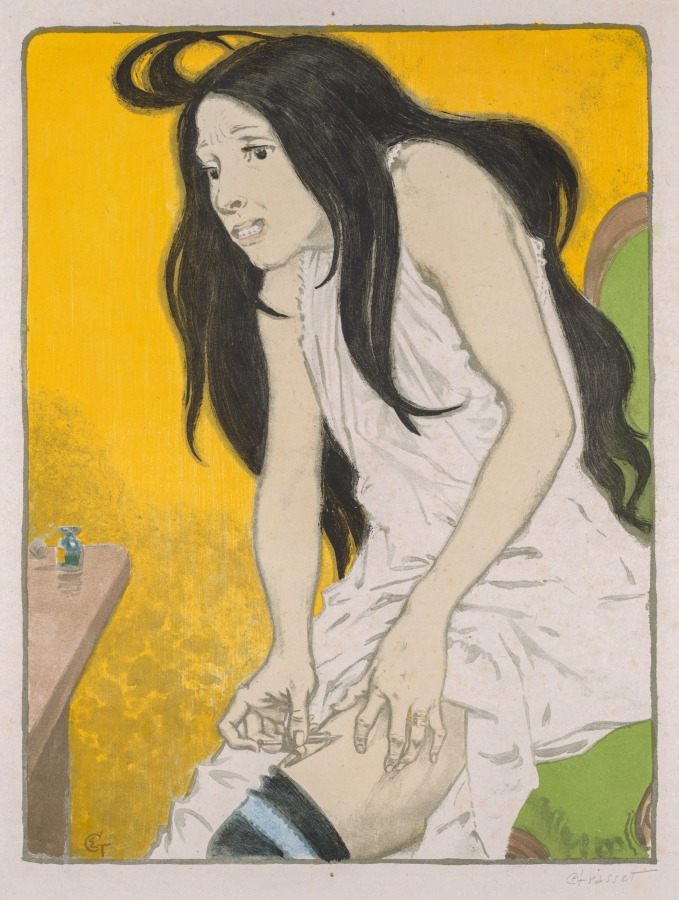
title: Morphine Addict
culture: France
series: L'Album d'estampes originales de la Galerie Vollard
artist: Eugène Grasset (French, 1841–1917)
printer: Auguste Clot (French, 1858–1936)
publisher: Ambroise Vollard (French, 1867–1939)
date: 1897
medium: color lithograph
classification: Print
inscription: Signed in graphite, lower right: Grasset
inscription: in plate, lower left: monogram of the artist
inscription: collector’s mark, lower right: Dr. Albin Woldemar von Dietel (L. 2772b)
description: Eugène Grasset was best known for idealized and decorative images of women. This lithograph, however, focuses on a darker theme—morphine addiction. A young woman is shown at the height of withdrawal as she injects herself with the drug. The syringe was invented just a few decades prior, and its inclusion was meant to give the image a sense of modernity.